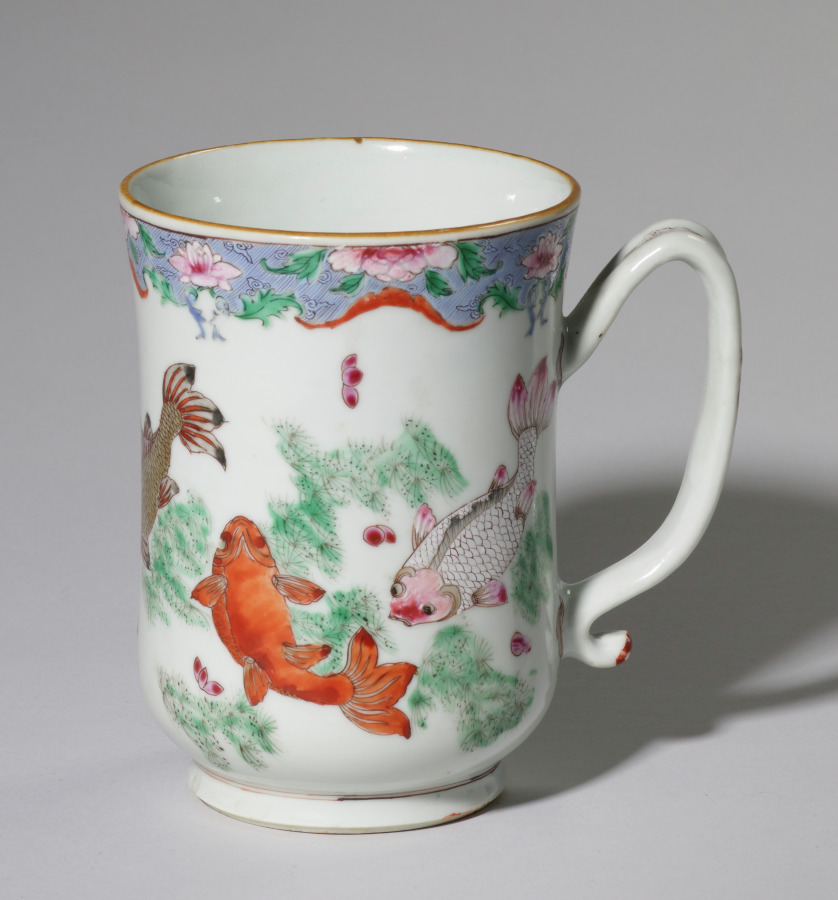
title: Mug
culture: China, Chinese Export -- European Market, 19th century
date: c. 1800–1825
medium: porcelain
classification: Ceramic